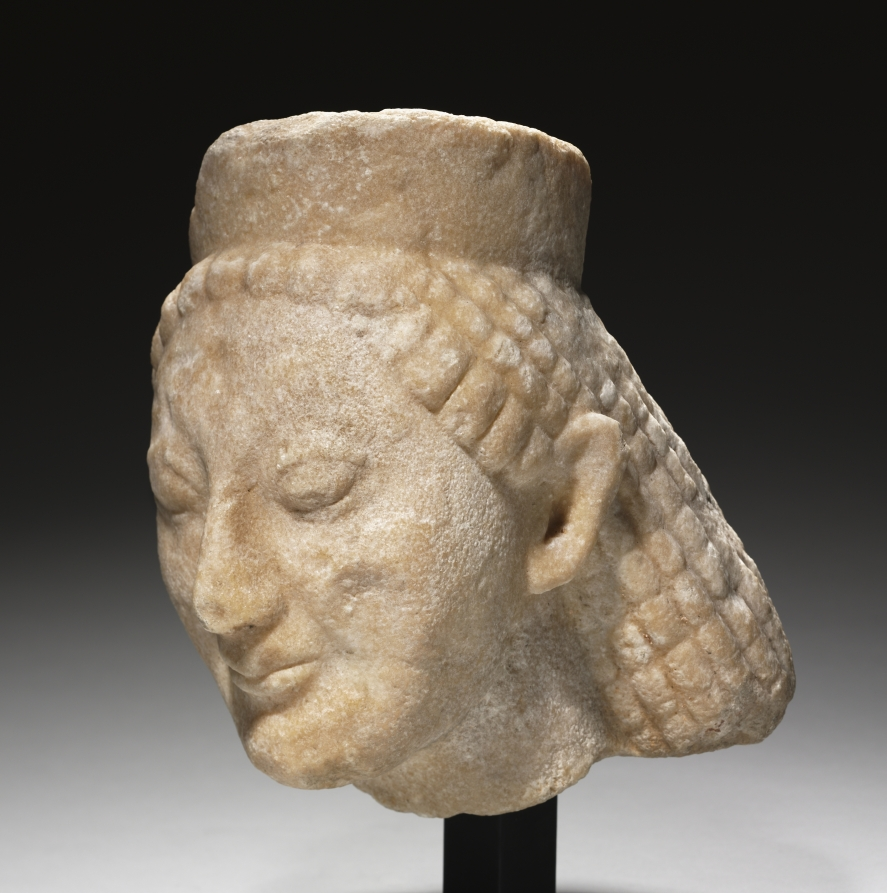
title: Head of a Sphinx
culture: Greece, Archaic period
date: 540–520 BCE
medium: marble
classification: Sculpture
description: This female head once belonged to a sphinx, a mythological hybrid creature with the head of a woman and body of a winged lion. Her short cylindrical crown, known as a polos, helps to identify her as a sphinx, as does the slope of her hair and neck, which once continued onto a feline body. Also common in ancient Egyptian and Near Eastern art (though more often in male form), the sphinx is best known in Greek mythology for devouring passersby who could not answer her riddle outside the Boiotian city of Thebes. Stone sphinxes like this one served as both votive offerings and grave monuments in Archaic Greece.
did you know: Greek sphinxes were often placed on top of columns or grave stelai as guardian figures.